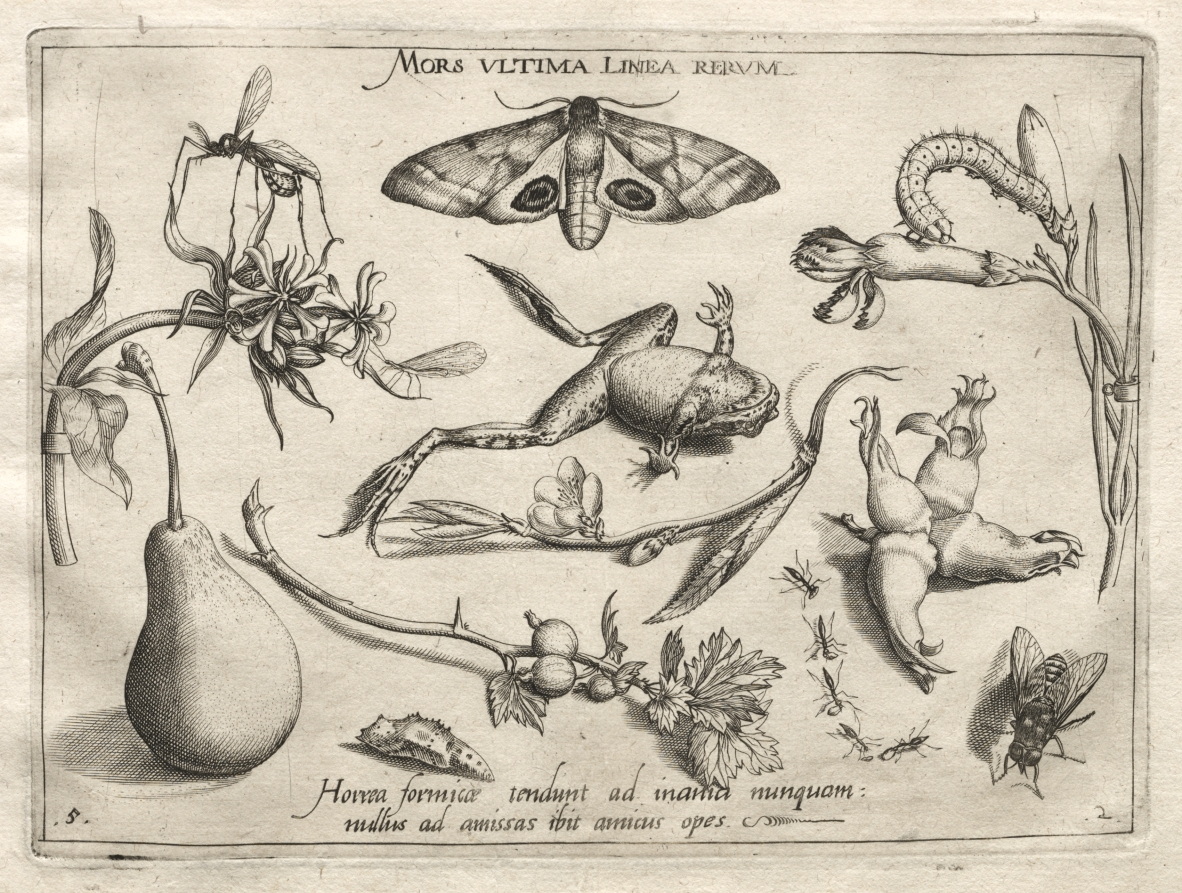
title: Archetypes and Studies: Death is the line that marks the end of all (Part II, plate 5)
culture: Flanders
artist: Joris Hoefnagel (Flemish, 1542–1600)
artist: after Jacob Hoefnagel (Flemish, 1575–1630)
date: 1592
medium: engraving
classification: Print